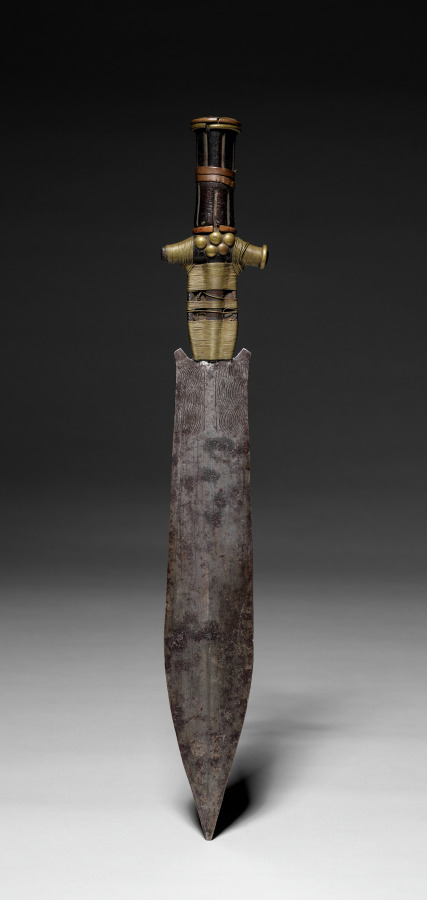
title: Knife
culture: Africa, Central Africa, Democratic Republic of Congo, unknown maker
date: 1800s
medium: Iron, wood, copper alloy, leather or rawhide, and upholstery studs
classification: Arms and Armor